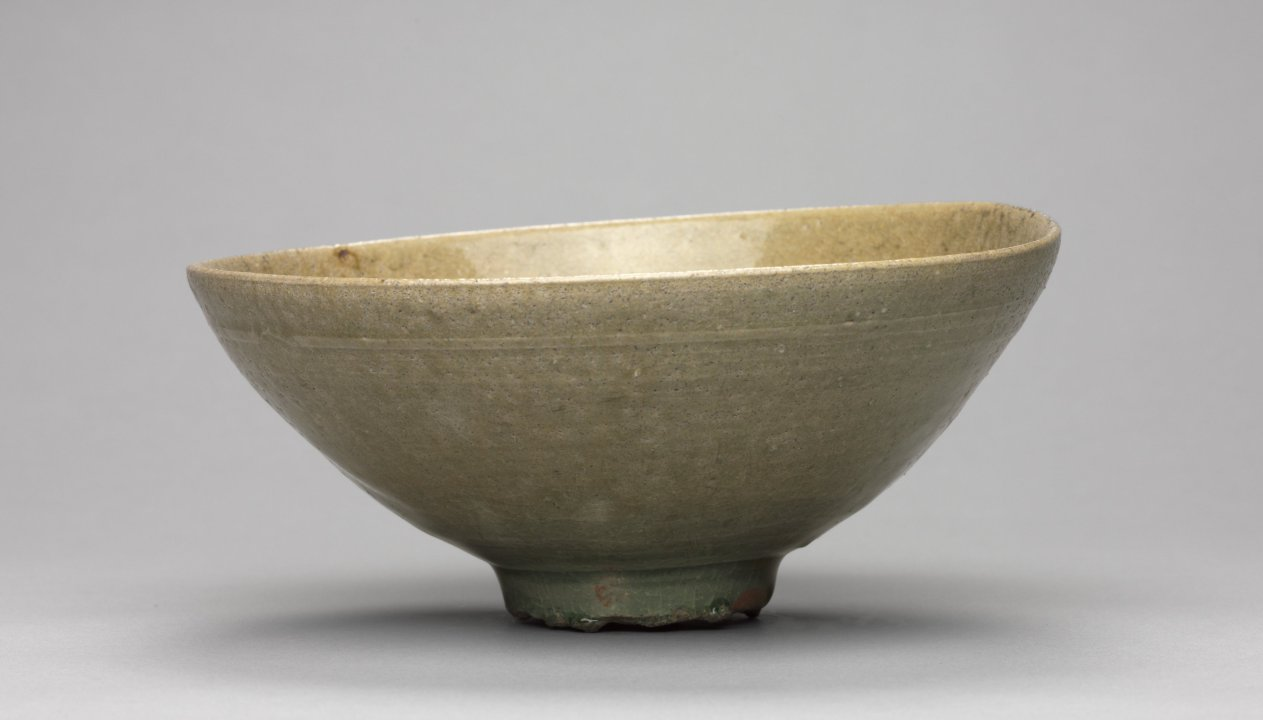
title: Bowl with Peony Design in Relief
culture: Korea, Goryeo dynasty (918–1392)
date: 1200s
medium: pottery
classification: Ceramic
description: As early as the 600s, the practice of drinking tea and wine became an important part of elite leisure culture in Korea. A wide bowl like this example was especially suitable for drinking powdered tea shaved from a compressed tea cake, the most commonly enjoyed type during the Goryeo period. A large bloomed peony in relief on the inside of this tea bowl may have made the moment of drinking tea more enjoyable.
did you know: Kangjin and Buan kilns in Jeolla province were the two major production centers for celadon wares during the Goryeo period (918-1392).